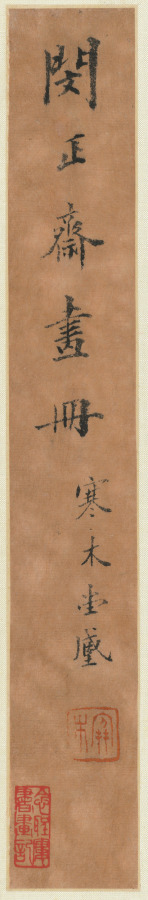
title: Album of Miscellaneous Subjects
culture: China, Qing dynasty (1644-1911)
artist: Min Zhen (Chinese, 1730–after 1788)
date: 1788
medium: Album of twelve leaves; ink on paper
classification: Painting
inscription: 予素有怪石之僻。余友戴笠山人嗜予畫，亦猶予之嗜怪石焉。向故訂約，以所好相易。值余奔馳遷延，今夏偶憶及怪石之在吾齋已五載。繪此以踐前言。誌以奇峭為十二冊之終。時戊申六月六日，正齋閔貞謹識。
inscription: Six seals appearing on the leaves: Min Zhen 閔貞; Zheng zhai 正齋; Qingqiao 青橋; Zhen 貞; Liao tang 蓼塘; Min Zhen zhi yin 閔貞之印。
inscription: 正齋傳世真跡，應推此冊為第一。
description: Min Zhen, who was orphaned at age 12 and developed an eccentric personality, was trained by Tang Yin (1682–1756), a writer, playwright, and superintendent of the imperial porcelain workshops in Jingdezhen. The connection to him may have enabled Min to stay in Beijing for a decade from around 1773. It is not clear whether he ever resided in Yangzhou, but his style is in many instances reminiscent of that of Yangzhou artist Huang Shen. This album demonstrates Min’s versatility and mature style in the last years of his life.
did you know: This album was painted for his friend Dailili Shanren in exchange for a scholar’s stone.